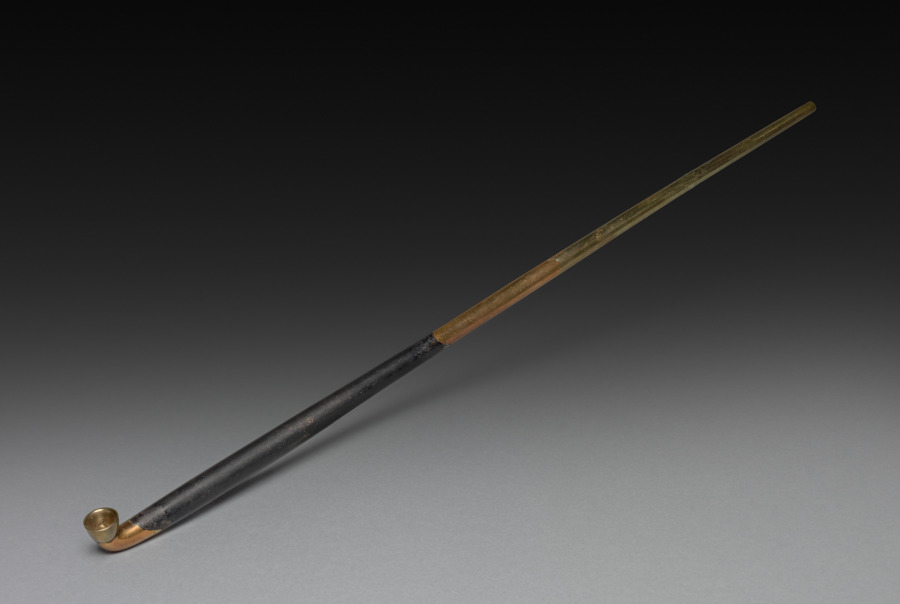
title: Tobacco Pipe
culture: Japan, Edo period (1615–1868)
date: 1700s–mid-1800s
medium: metals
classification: Miscellaneous